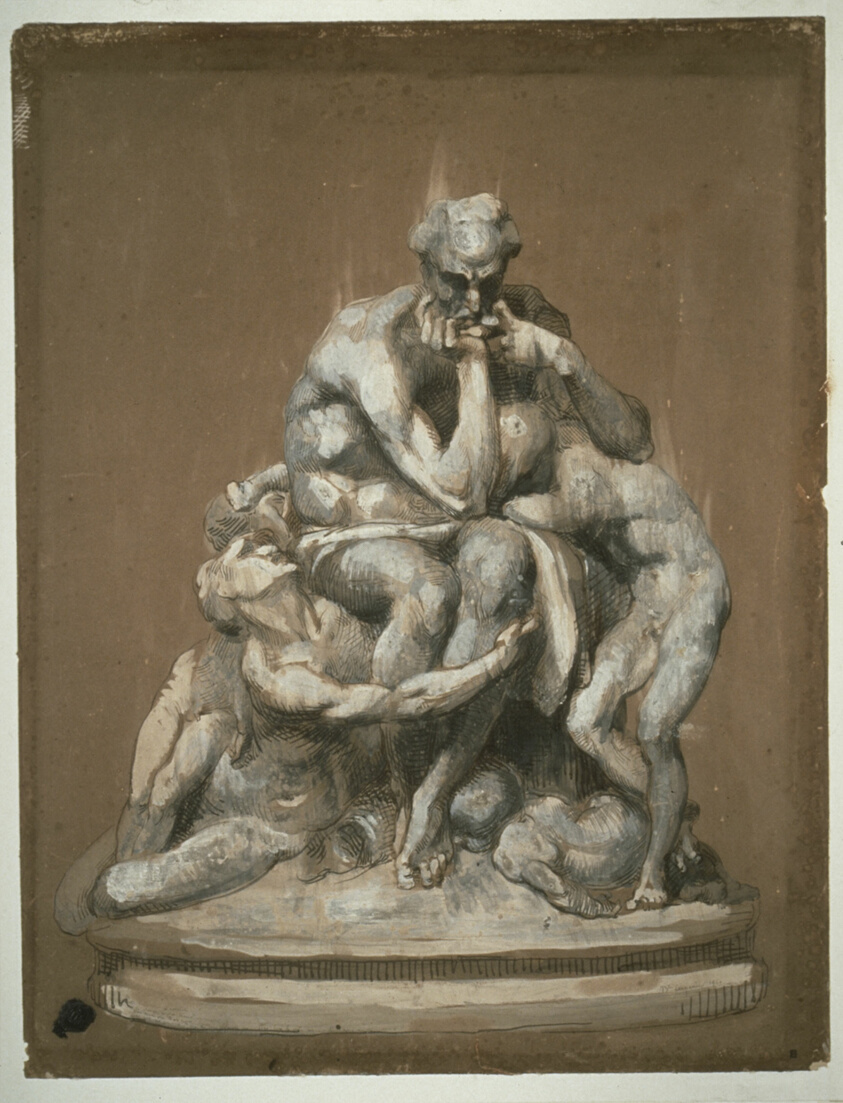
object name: Drawing and Watercolor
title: Study for the Sculpture Ugolino and His Children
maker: Jean Baptiste Carpeaux (French, 1827-1875)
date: 1860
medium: Pen and brown ink and opaque white and gray watercolors with white oil paint and black watercolor over black chalk on brown wove paper (Bristol board)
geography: France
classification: gouache; drawings (visual works); prints and drawing